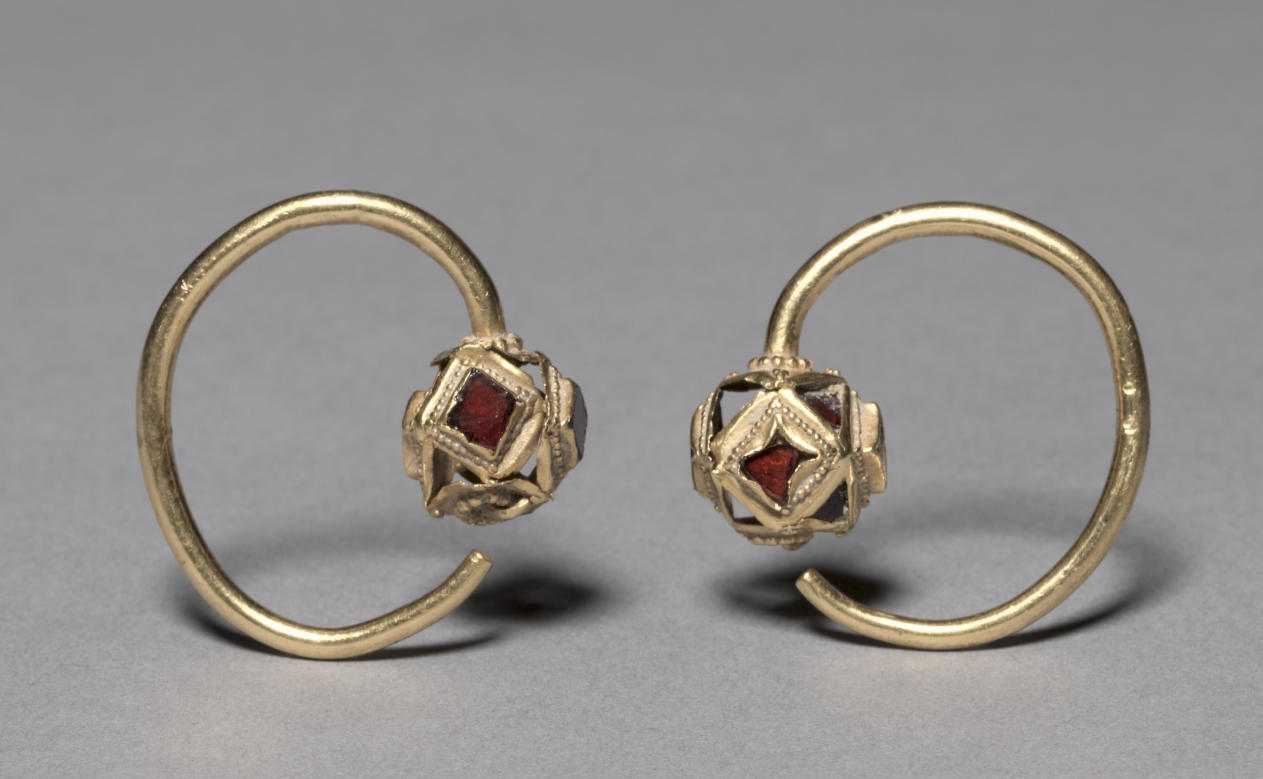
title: Earring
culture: Ostrogothic, Migration period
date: 400s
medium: gold with garnets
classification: Jewelry